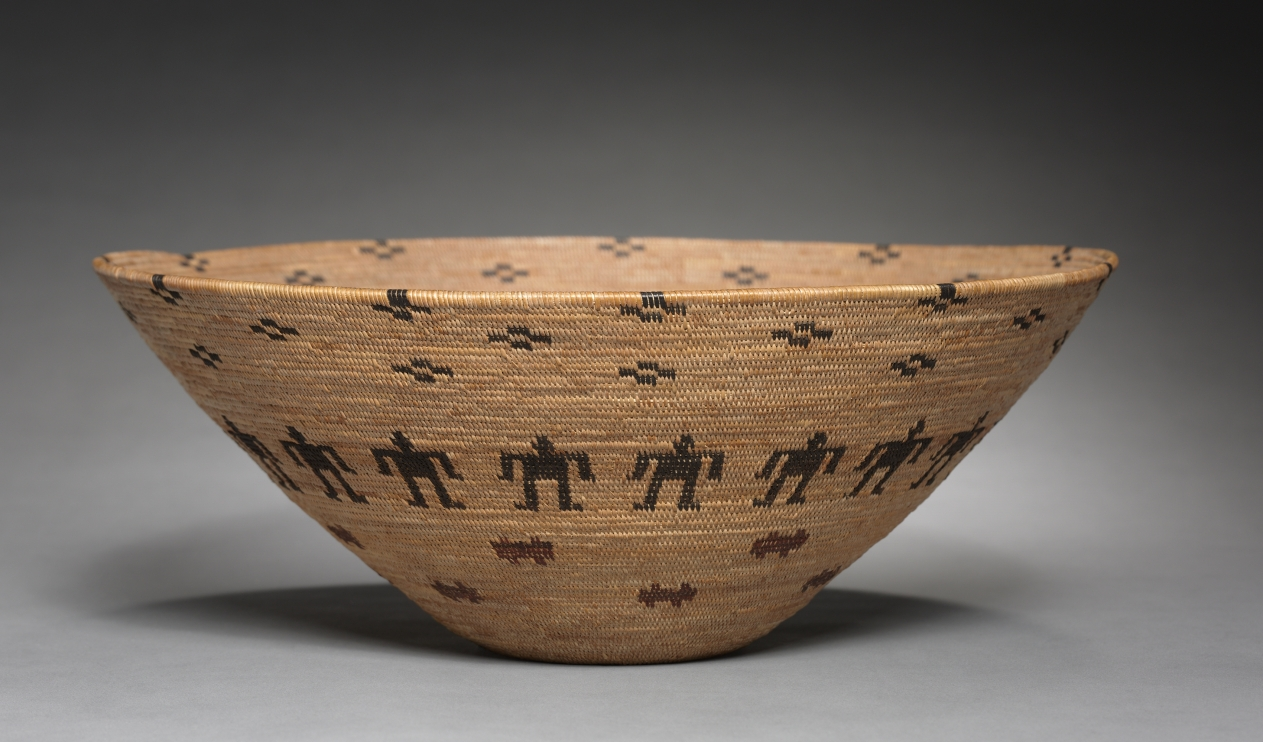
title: Bowl Basket (Unfinished)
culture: California, Yokuts, late 19th- early 20th century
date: 1895–1900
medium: Redbud, sedge, bracken fern; coiled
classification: Basketry